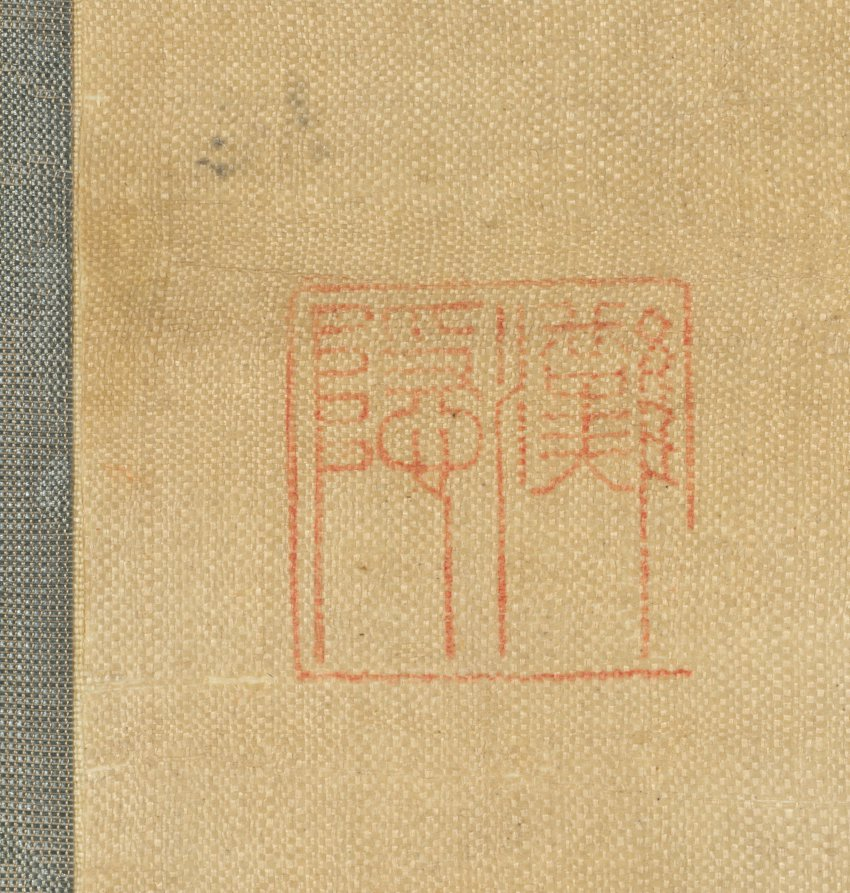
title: Bamboo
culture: Korea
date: 1900s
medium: hanging scroll; ink on silk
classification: Painting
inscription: With spurious seal of Yi Chong (1541-1622)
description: As one of the four symbols called "Four Gentlemen ( 四君子),” along plum blossoms, chrysanthemum, and orchids, bamboos represent strength, both physical and mental.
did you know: This work is modern imitation of the famous 17th-century literati painter Yi Jeong known for his bamboo painting in ink. Yi's original work is the collection of the Metropolitan Museum of Art (https://www.metmuseum.org/art/collection/search/50486).